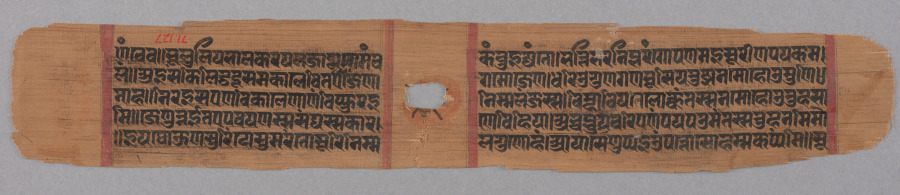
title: Folio 141 (recto), from a Kalpa-sutra and Story of Kalakacharya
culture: Western India, Gujarat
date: 1287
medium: gum tempera and ink on palm leaf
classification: Painting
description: Palm leaf was the preferred material for sacred texts before the 1400s in India. The text here was often appended to the Kalpa-sutra, the most sacred book of Jainism. This story concerns the life of a Jain teacher named Kalaka, a prince who developed the ability to work magic after he become a monk, inspired by the teachings of a holy man. The painting on this page shows a monk clad in white, indicating his affiliation with the Shvetambara (“white clad”) branch of Jainism. It is the second to the last page of the manuscript and includes the beginning of the colophon, which contains information about when and where this manuscript was produced.